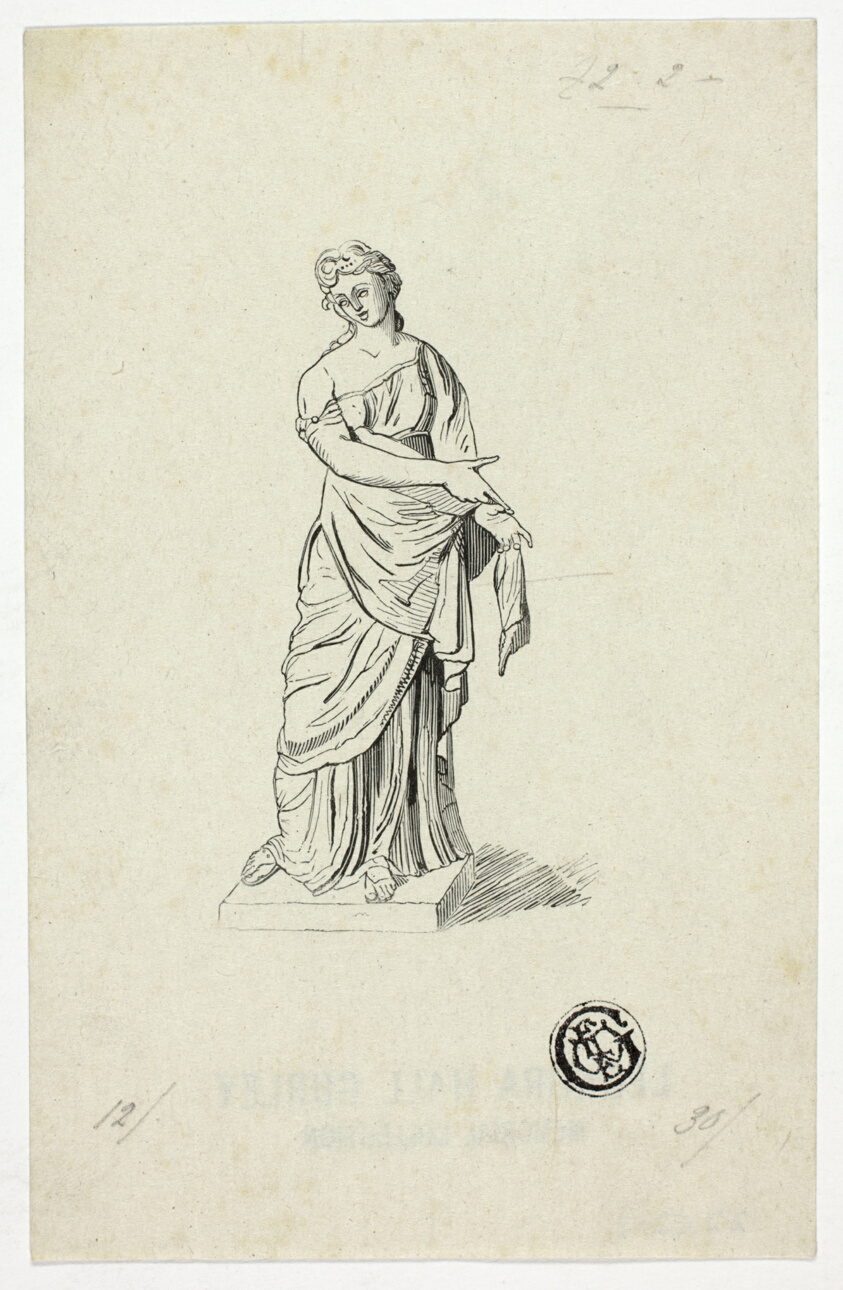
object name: Drawing and Watercolor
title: Allegorical Figure (Statue)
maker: Artist Unknown; Likely European, 18th century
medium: Pen and ink on paper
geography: Europe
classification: pen and ink drawings; drawings (visual works); prints and drawing